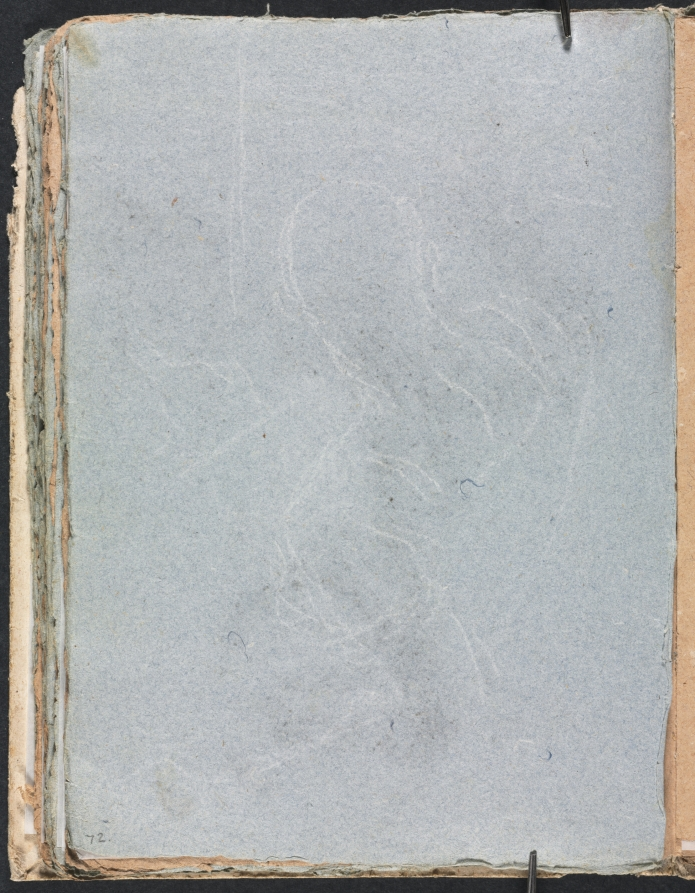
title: Verona Sketchbook: Figure study (page 72)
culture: Italy, 18th century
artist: Francesco Lorenzi (Italian, 1723–1787)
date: 1760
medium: white chalk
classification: Bound Volume